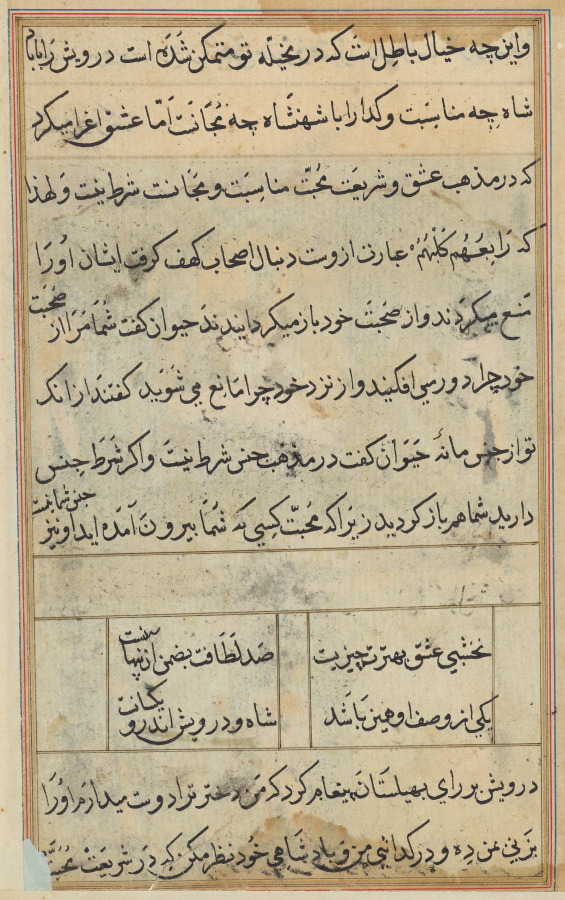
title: Page from Tales of a Parrot (Tuti-nama): text page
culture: Mughal India, court of Akbar (reigned 1556–1605)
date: c. 1560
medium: gum tempera, ink, and gold on paper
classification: Painting